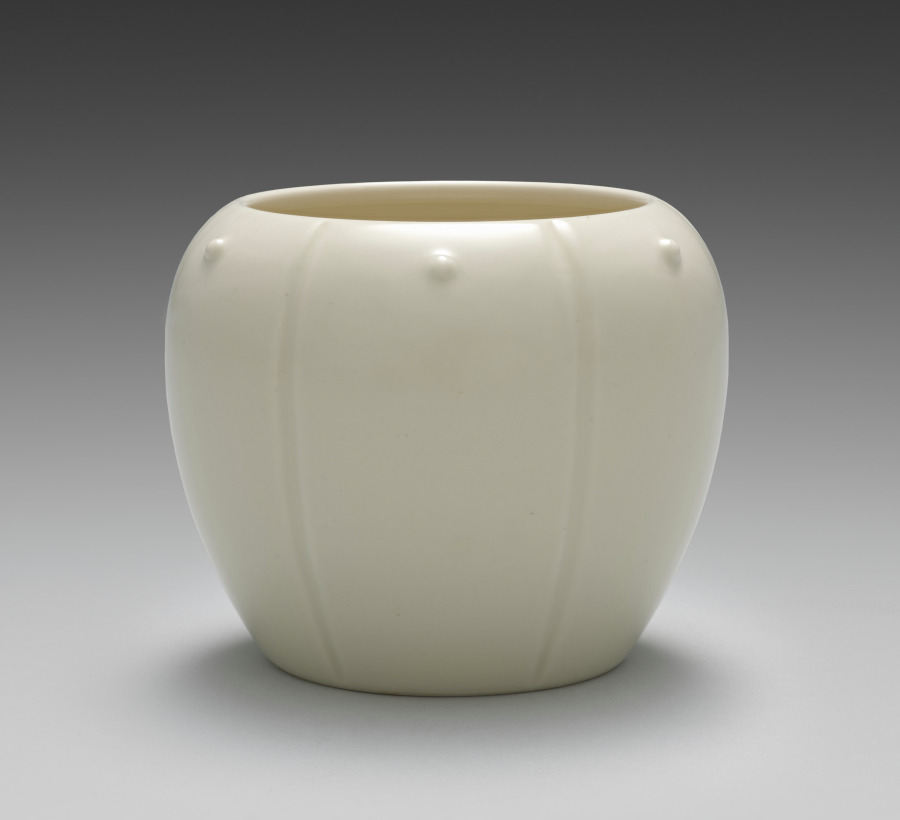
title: Container from Lit Charcoal and Ash Containers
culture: Japan, Meiji period (1868–1912)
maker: Seifū Yohei III (Japanese, 1851–1914)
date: 1893–1914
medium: One from a set of four containers; porcelain with molded design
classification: Ceramic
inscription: 清風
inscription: The storage box for this set is inscribed and impressed with seals.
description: The box lid for these six-lobed lit charcoal and ash containers, or hiire, identifies them as kōhakuji, another of Yohei III’s translucent cream colors over ivory clay bodies. One might translate the name as “lustrous pearl[–glazed ivory] porcelain.” A hiire was filled with ash with burnt coals at the center so that embers and tobacco ash could be discarded safely during a gathering. Each of the lobes on the containers has a round protrusion set below the rim. The studlike pattern is called ruiza. The term is also used to describe the pattern that rings the shoulder of some flower vases or metal kettles used in chanoyu.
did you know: The Seifu studio generally followed the standard practice in Japan for identifying the artist and object in box inscriptions.